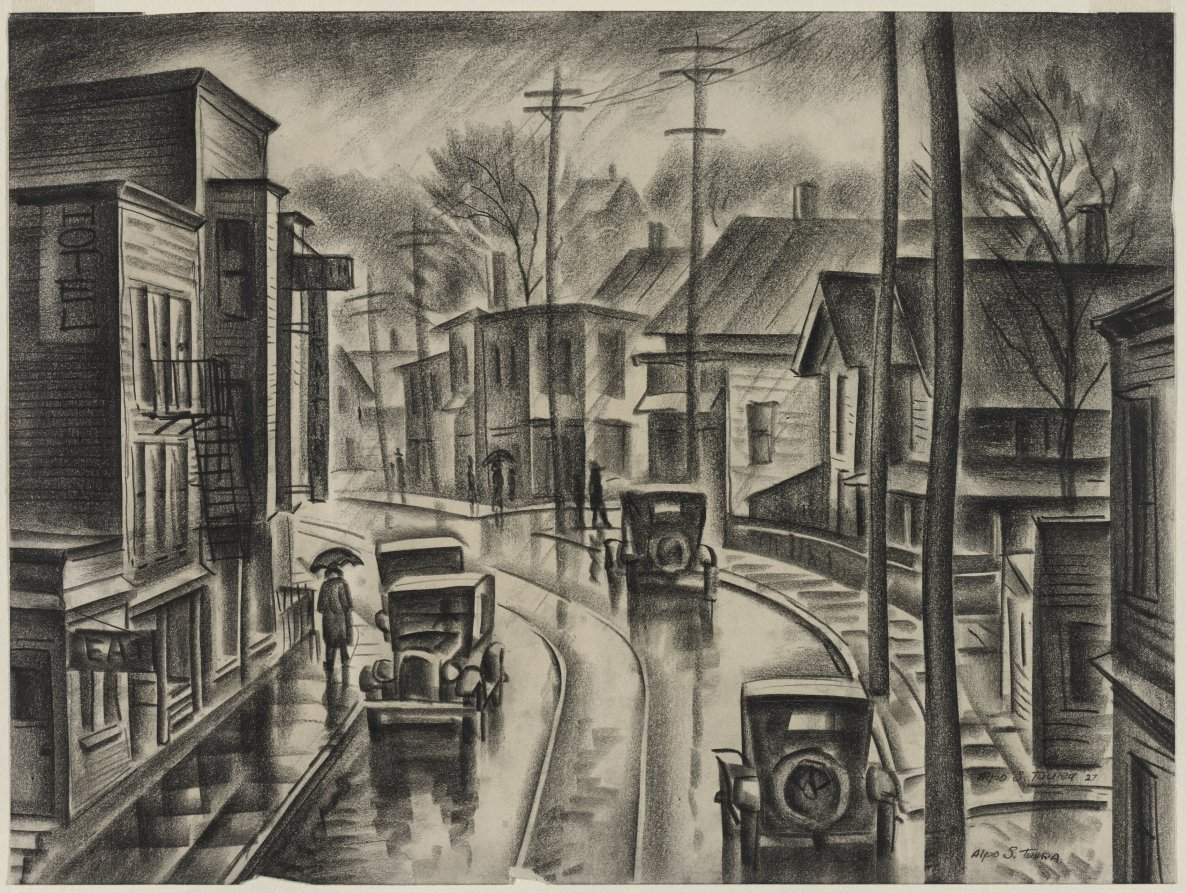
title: Wet Little Italy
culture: America, Ohio, Cleveland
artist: Alpo S. Tuura (American, 1902–1928)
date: 1927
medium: conté crayon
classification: Drawing